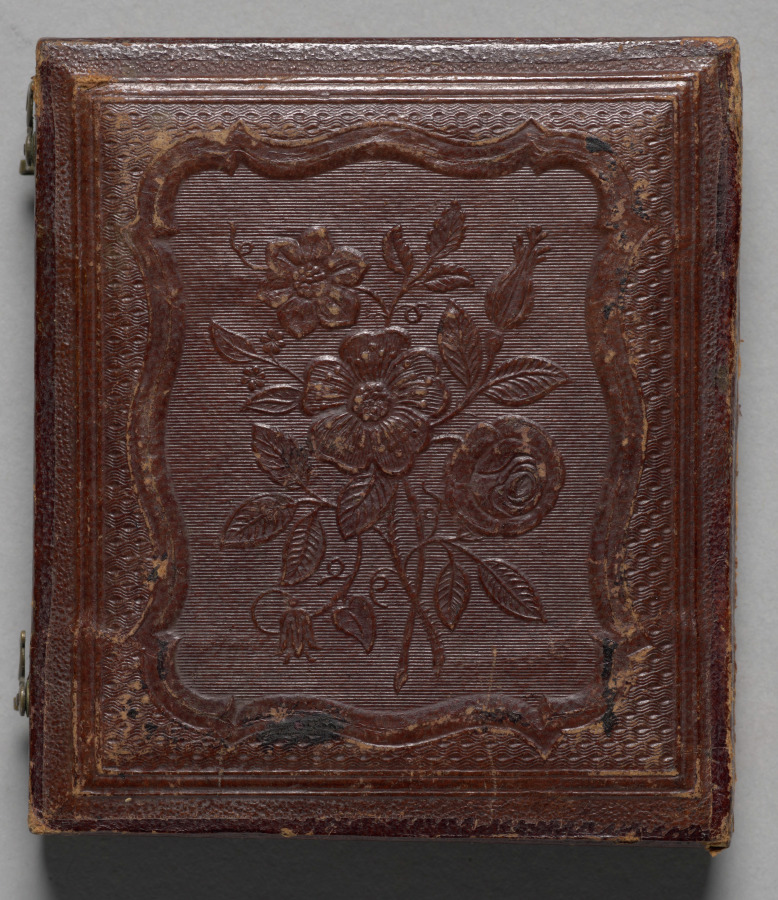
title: Standing boy with bottle curls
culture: America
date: c. 1853–54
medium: daguerreotype, sixth plate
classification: Photograph